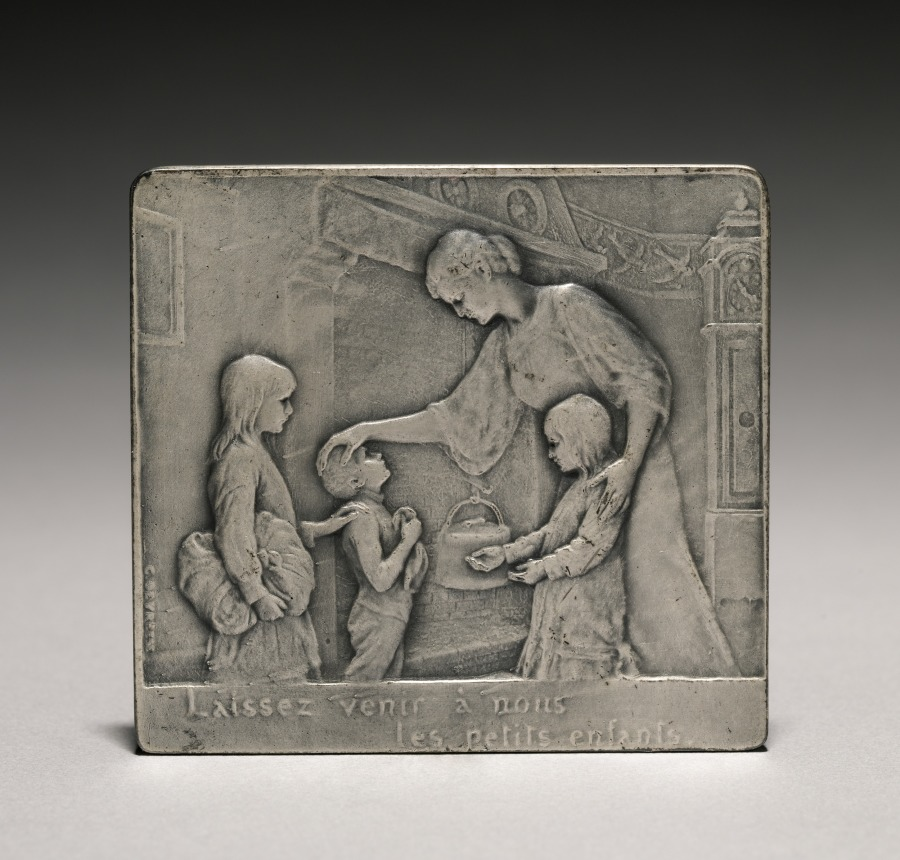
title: Plaquette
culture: Belgium, 20th century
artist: Godefroid Devreese (Belgian, 1861–1941)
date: 1900s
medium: bronze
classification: Metalwork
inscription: obverse - "Laissez venir à nous les petits enfants." reverse - inscribed lower left: "G. Devreese"; lower right: "SEUTS."